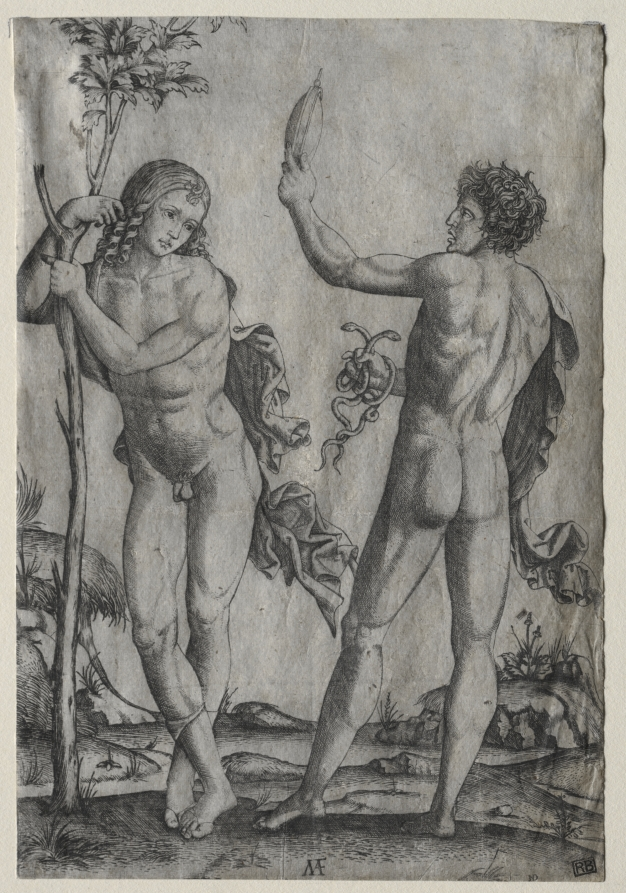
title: Two Nude Men Beside a Tree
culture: Italy, 16th century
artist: Marcantonio Raimondi (Italian, 1470/82–1527/34)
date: c. 1510–27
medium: engraving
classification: Print